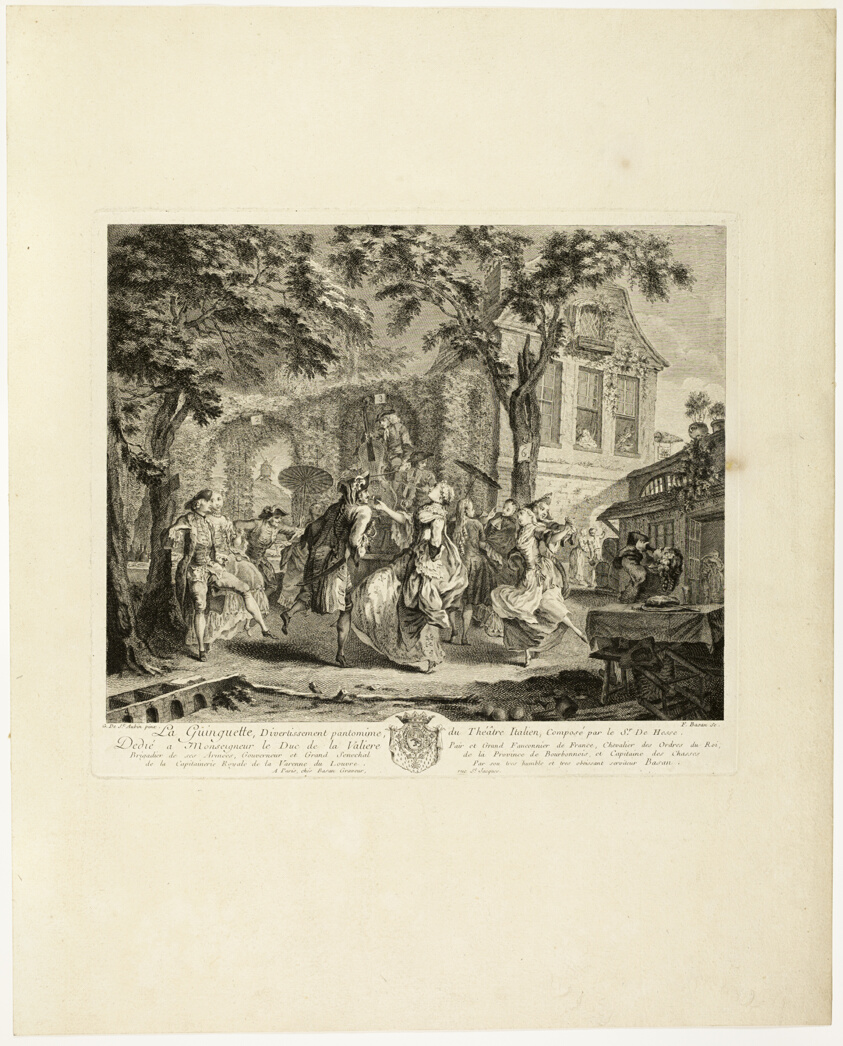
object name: Print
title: The Dance Hall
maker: Pierre François Basan (French, 1723-1797); after Gabriel de Saint-Aubin (French, 1724-1780)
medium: Etching and engraving in black on cream laid paper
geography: France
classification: etching; paper; print; prints and drawing